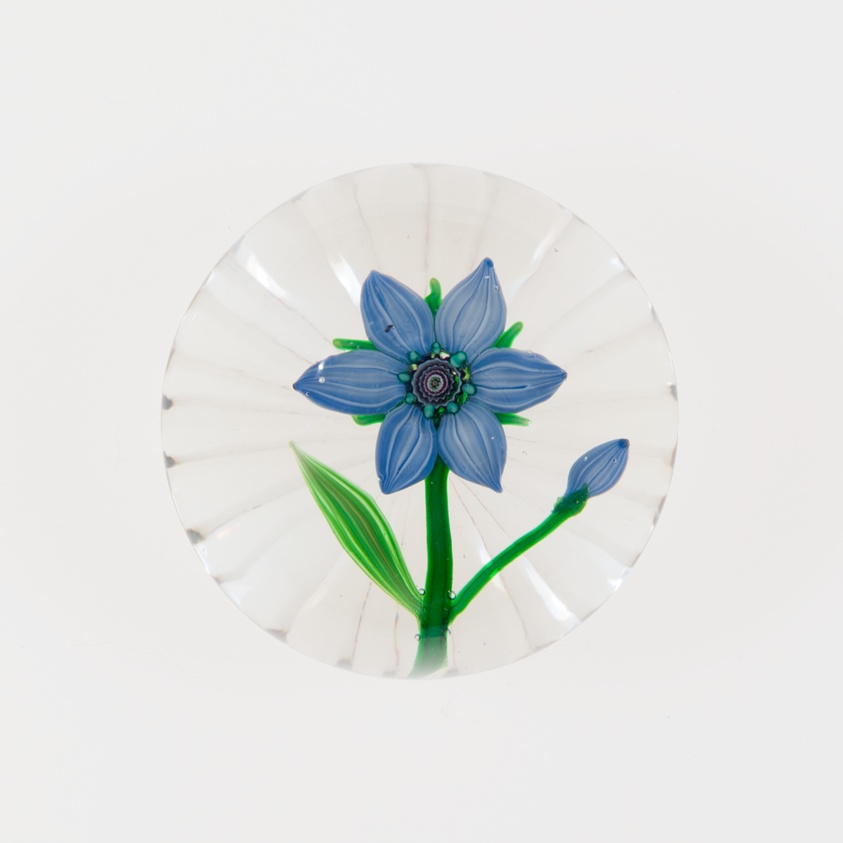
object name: Glass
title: Paperweight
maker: Clichy Glassworks (Cristalleries de Clichy); Clichy, France, 1837-1885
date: 19th century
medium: Glass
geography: Clichy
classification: paperweight; millefiori; european decorative arts; glass